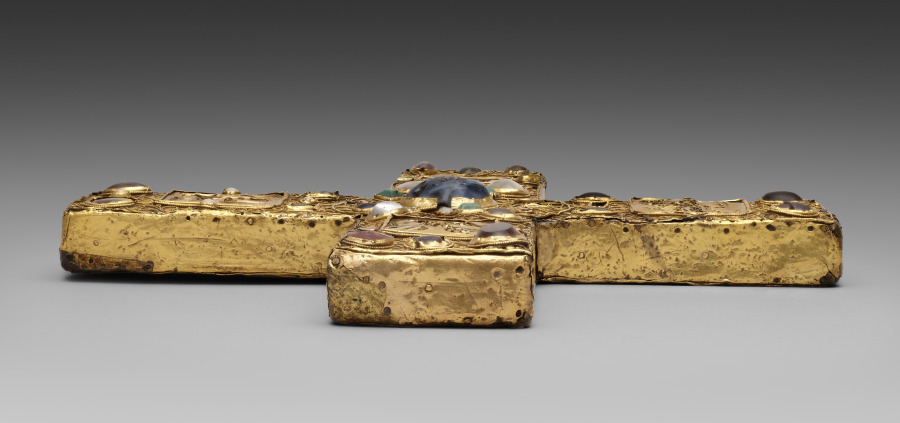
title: Ceremonial Cross of Countess Gertrude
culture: Germany, Lower Saxony?, 11th century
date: 1038 or shortly after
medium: gold: worked in repoussé; cloisonné enamel, intaglio gems, pearls, wood core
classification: Metalwork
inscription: translation of inscription on back: For the Relics of the Holy Apostle Peter and the Holy Virgin Liutrudis, Countess Gertrude Ordered this made.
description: This precious gold cross was commissioned by Countess Gertrude (died 1077) and given to the church of Saint Blaise following the death of her husband, Count Liudolf of Brunswick (died 1038). The cross was intended to be carried in liturgical processions or to be placed on a church altar. The inclusion of relics within the crosses endowed them with an additional role as devotional objects. At the center of the four cross arms, fine but much damaged cloisonné enamel plaques represent the symbols of the four Evangelists--an eagle for Saint John (above); a lion for Saint Mark (on the left); an ox for Saint Luke (on the right); and an angel for Saint Matthew (below). Pearls and precious and semiprecious stones are set within an intricate network of gold filigree while a large sapphire, inscribed in a circle and likewise surrounded by pearls and precious stones, is placed at the crossing.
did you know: Countess Gertrude's name appears on the back of the cross at the bottom.